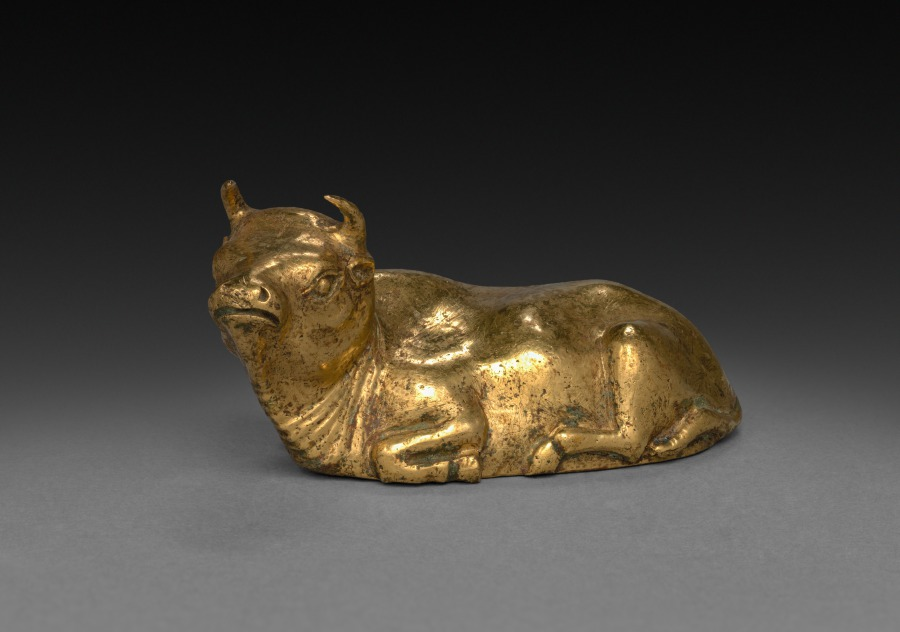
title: Recumbent Bull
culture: China, Tang dynasty (618-907)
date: 700s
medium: gilt bronze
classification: Sculpture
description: In China, access to political power was granted to those who passed the civil service examinations, a system that offered official service only at a high level of education. Chinese literati-officials whose daily routine was administrative work in an office, enjoyed precious objects on their writing table that offered distraction and demonstrated good taste, as well as the pleasure of holding and handling them. By the Ming (1368–1644) and Qing (1644–1911) dynasties, these utensils of the literati studio also became collectibles and were treasured as artworks. Made of solid gilt-bronze, this paperweight in the form of a recumbent bull was meant to be placed on a scholar’s desk. Oxen were precious livestock as they could pull carts and plows. Often depicted in landscape paintings and in pictures of tilling the spring soil, the bull’s nature was traditionally likened to the willingness of a loyal civil servant who bears the burden of hard labor without complaint.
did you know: This solid-cast bronze bull has carefully defined skin folds on its neck.